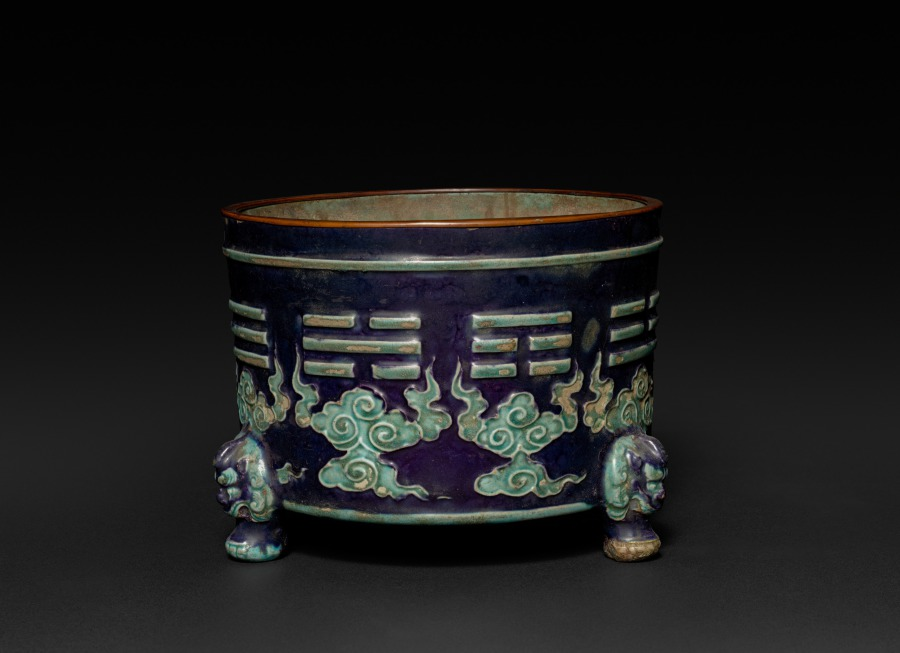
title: Small Jardiniere with Three Legs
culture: China, Jiangxi Province, Ming dynasty (1368–1644)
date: 1368–1644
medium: porcelain, Fahua ware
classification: Ceramic